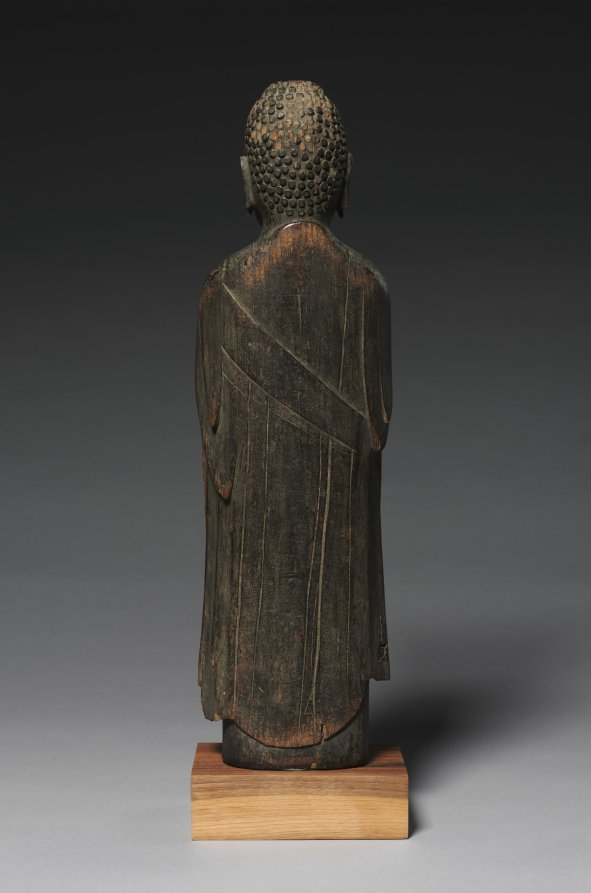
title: Sakyamuni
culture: Korea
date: 1900s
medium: wood with traces of black lacquer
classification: Sculpture